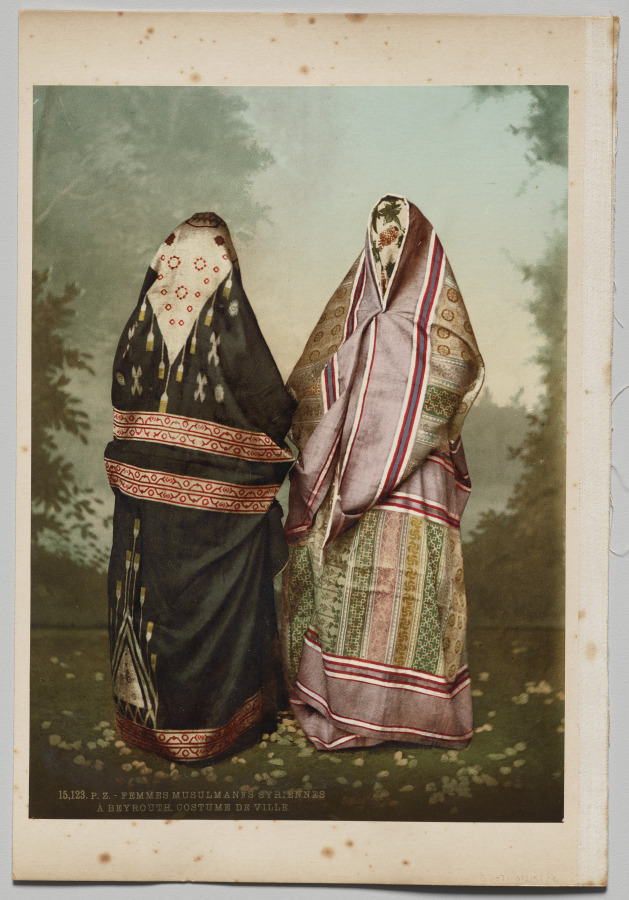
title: Femmes musulmanes Syriennes à Beyrouth, Costume de Ville (Two Women)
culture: France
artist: Félix Bonfils (French, 1831–1885)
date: c. 1880s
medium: Photochrom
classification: Photograph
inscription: Imprinted in gold on recto of image: "15,123. P.Z.-FEMMES MUSULMANES SYRIENNES/A BEYROUTH, COSTUME DE VILLE"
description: To make a photochrom, a photographic negative was transferred onto a lithographic stone, then printers created a minimum of six and up to fifteen different stones, each with a single color of ink, which were printed atop the black-and-white image. The printers creating the colors had never seen the original locale. Photochroms were popular from the 1890s into the 1910s and were most often collected in albums or framed and hung on the wall.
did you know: In the early 1880s, Félix Bonfils was among the first photographers to use the Photocrom process, which produced color images from a single black-and-white negative.